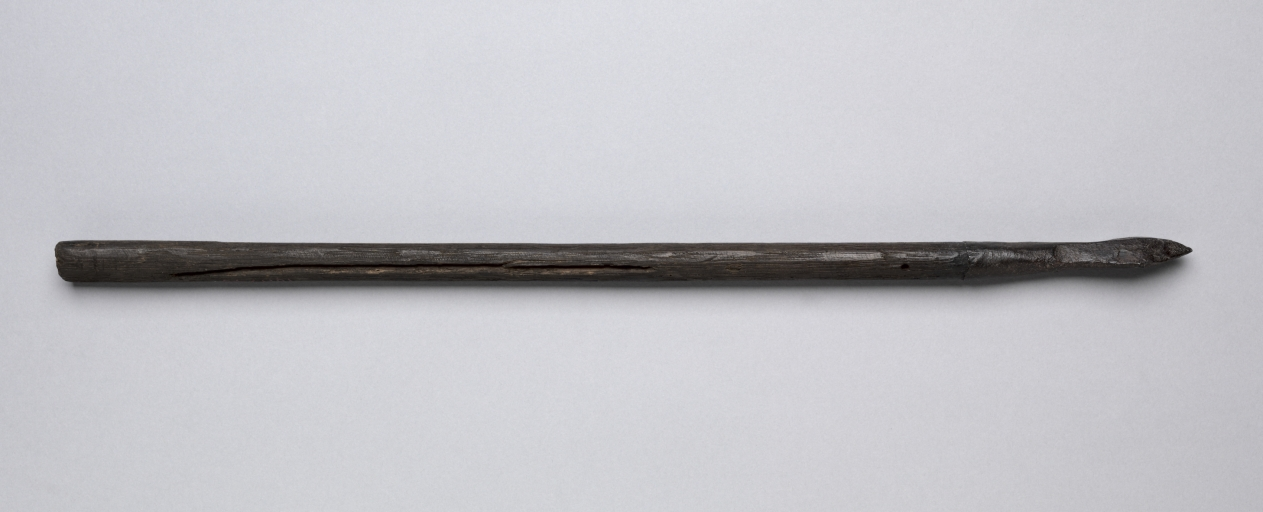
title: Crossbow Bolt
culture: Germany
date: 1500s-1600s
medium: wood, leather, steel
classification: Arms and Armor